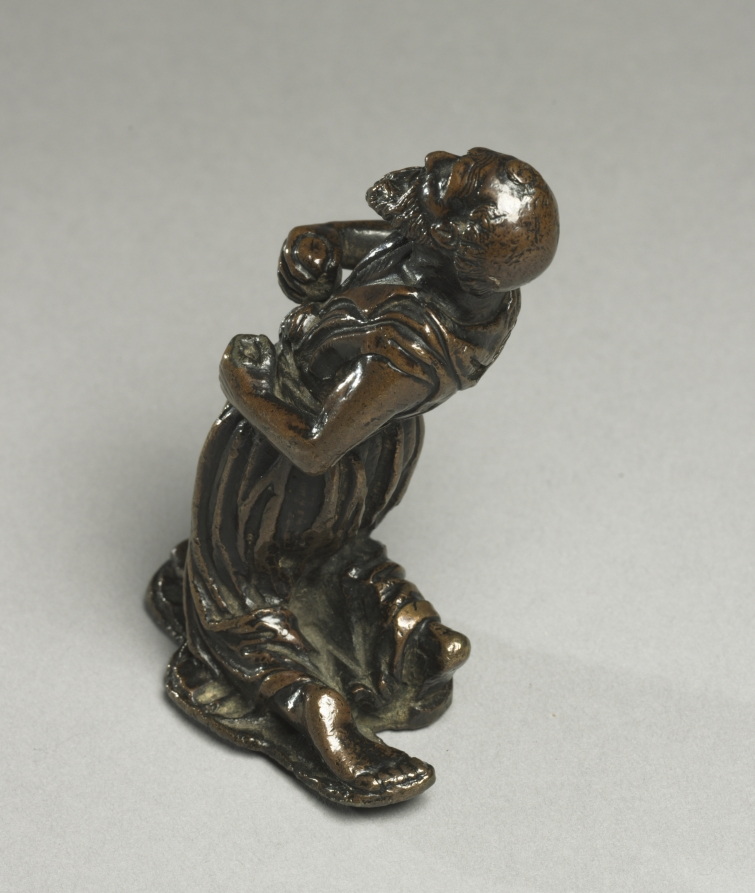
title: Kneeling Saint Jerome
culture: Italy, Ravenna, 16th century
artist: workshop of Severo da Ravenna (Italian, c.1496–c.1543)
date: c, 1525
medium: bronze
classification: Sculpture